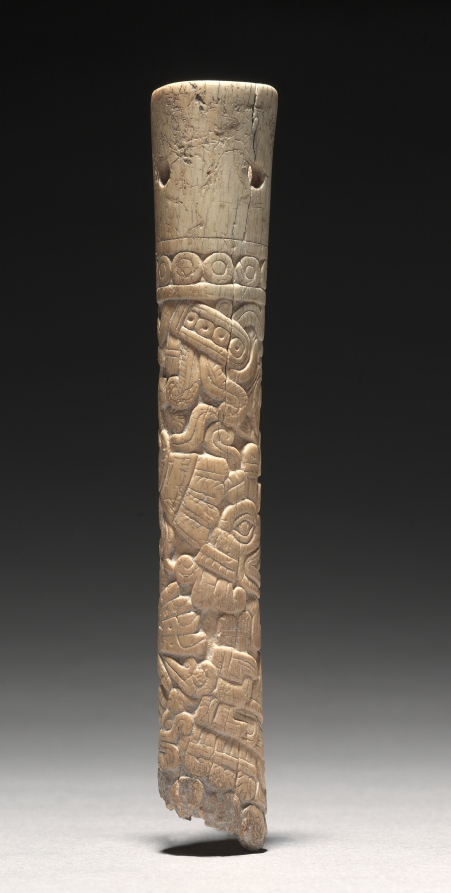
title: Carved Tube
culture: Mexico, Oaxaca, Mixtec, 13th-16th century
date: c. 1200–1519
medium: bone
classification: Jewelry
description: Carved in spiral registers, the ornamentation on this bone tube resembles Mixtec painting, both in codices (screenfold books) and architectural murals.